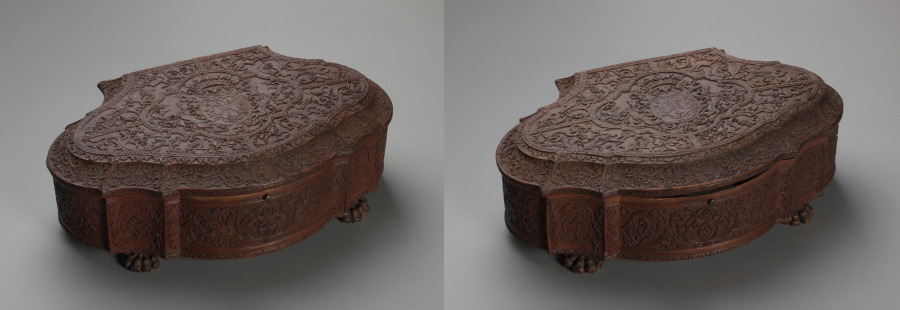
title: Pair of Boxes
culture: France, Nancy, early 18th century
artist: Bagard (French)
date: early 1700s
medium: wood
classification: Furniture and woodwork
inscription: on top of box, initials crowned by coronet